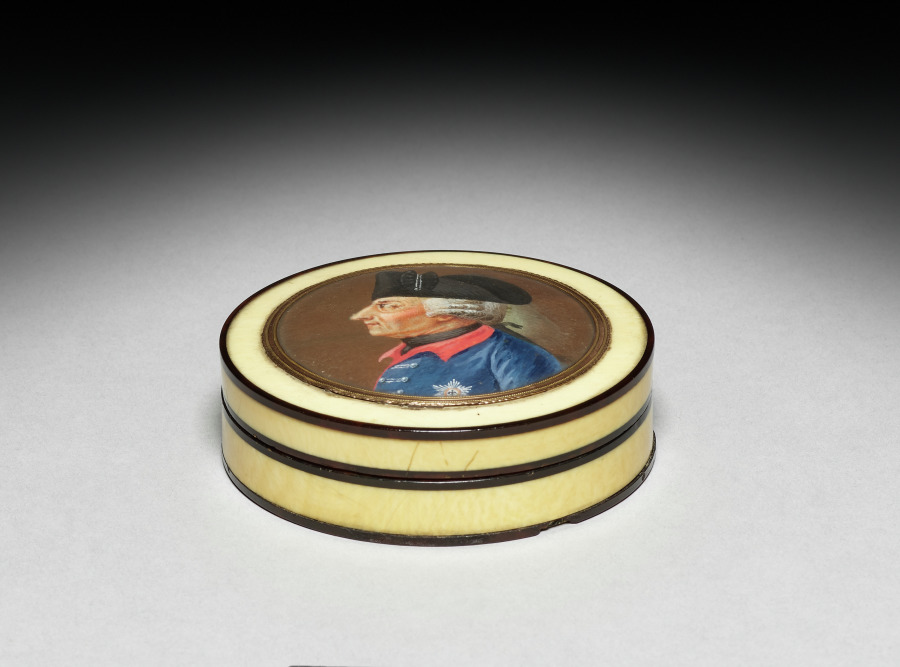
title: Snuff Box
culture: Germany, 18th century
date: c. 1770–1775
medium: tortoiseshell and ivory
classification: Miscellaneous